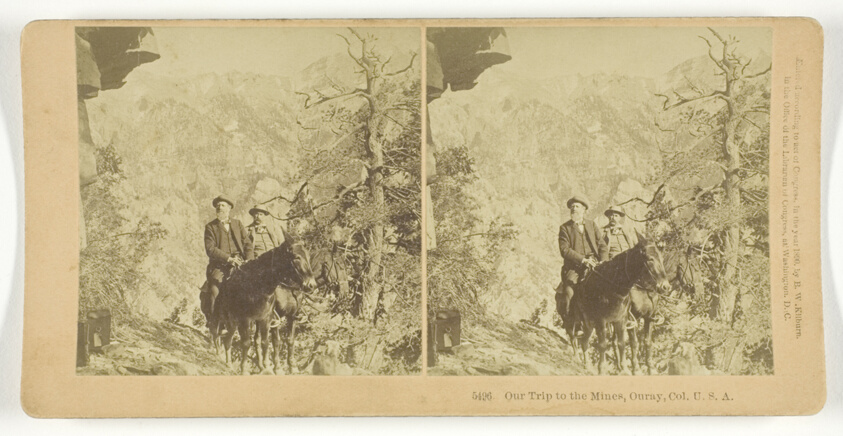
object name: Photograph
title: Our Trip to the Mines, Ouray, Col, U.S.A.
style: 19th century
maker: B. W. Kilburn; American, 1827–1909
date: 1890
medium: Albumen silver print, stereo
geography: United States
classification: stereograph (albumen); albumen silver print; photographic process; photography; photograph